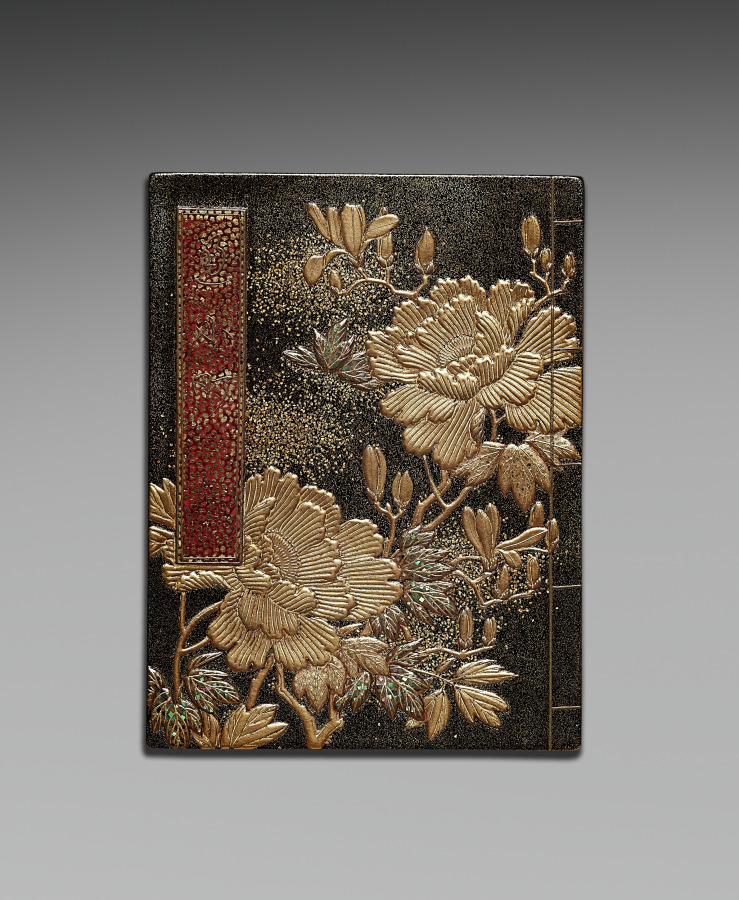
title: Nested Boxes with Chrysanthemums (inner box)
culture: Japan, Meiji period (1868–1912) or Taishō period (1912–26)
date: early 1900s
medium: lacquer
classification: Lacquer